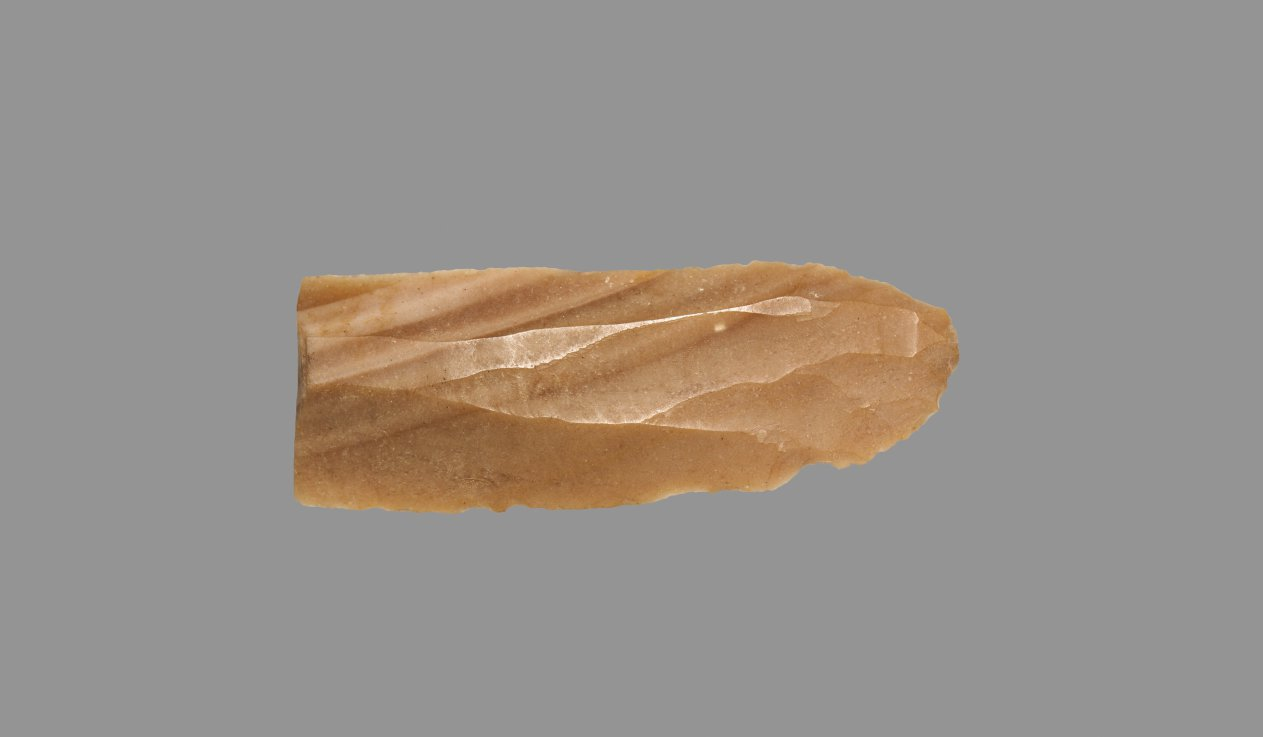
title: Sickle Blade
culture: Egypt, Middle Kingdom (2040–1648 BCE), Dynasty 12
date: 1980–1801 BCE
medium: flint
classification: Implements